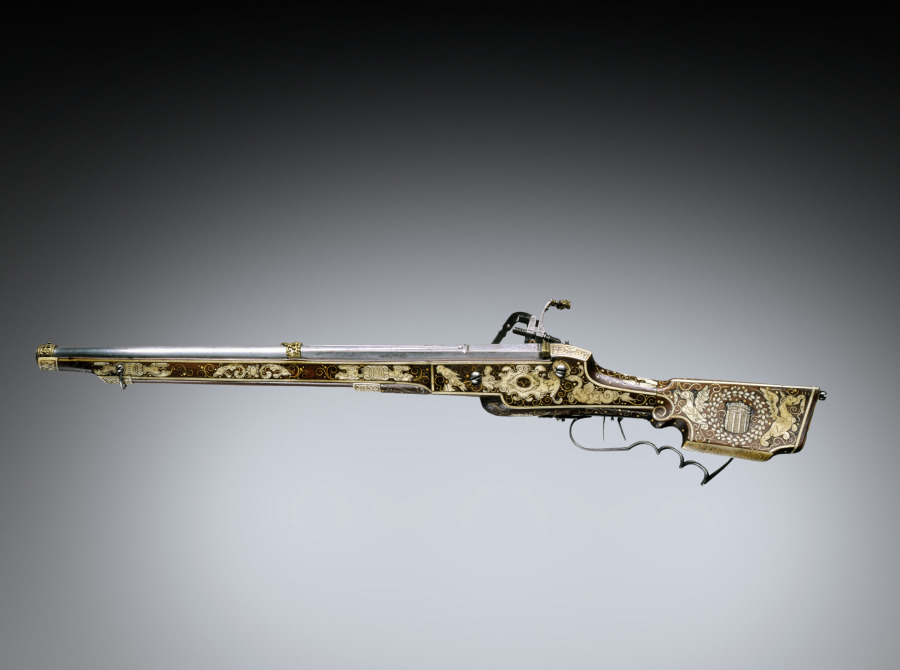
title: Wheel-Lock Rifle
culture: Germany, Bavaria (?), 17th century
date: 1618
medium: steel, brass, walnut stock inlaid with bone, horn and ivory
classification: Arms and Armor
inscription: on barrel: 1618, S.H.; on stock: FF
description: Made originally as a petronel pistol, this firearm seems to have been refitted with a new stock sometime during the 17th century to convert it into a rifle, most likely for a child's use.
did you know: The artisan who made this rifle used brass, bone, horn, and ivory to create decorative elements like animals involved in the hunt, fruits, and other details. If you look beneath the gun, you will see a goose or duck and a vase of flowers near the trigger.